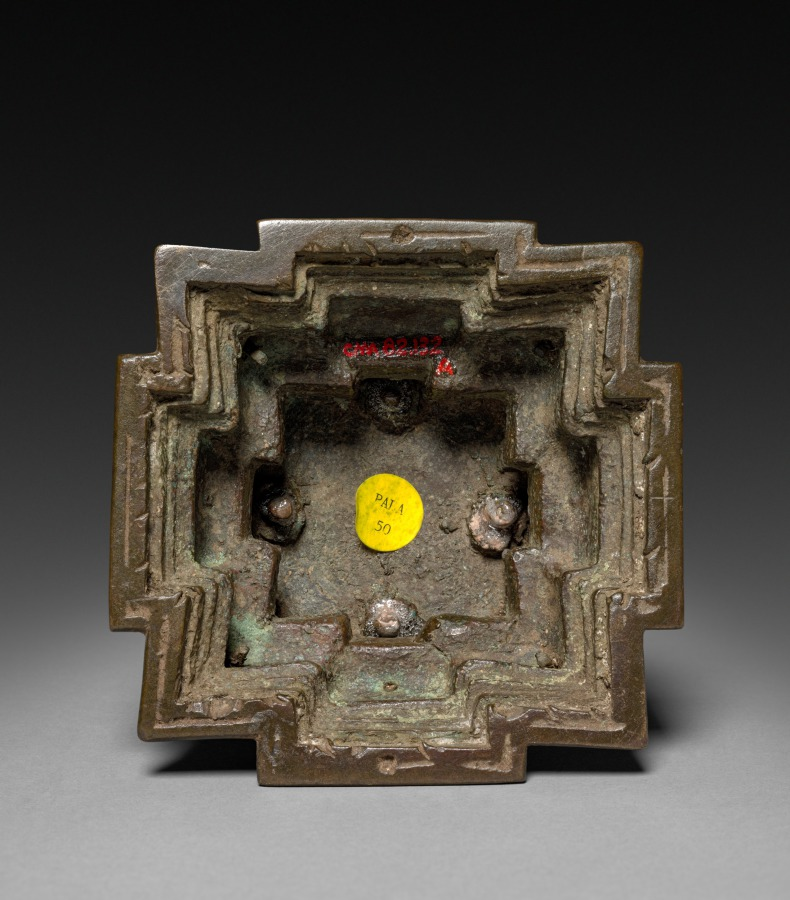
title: Miniature Votive Stupa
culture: Eastern India, Bihar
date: c. 1000s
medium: bronze with inlay of semiprecious stones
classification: Sculpture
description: Small-scale stupas were modeled on large monuments that contain relics of the Buddha or revered members of the Buddhist community within the solid, dome segment. Such models were made to commemorate a devotional visit to the monument. Four different sacred Buddhist images face each of the four directions: Shakyamuni, Vajrasattva, Maitreya, and Prajnaparamita.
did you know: The spire consists of thirteen disk-like parasols that refer to the thirteen stages on the path to enlightenment.